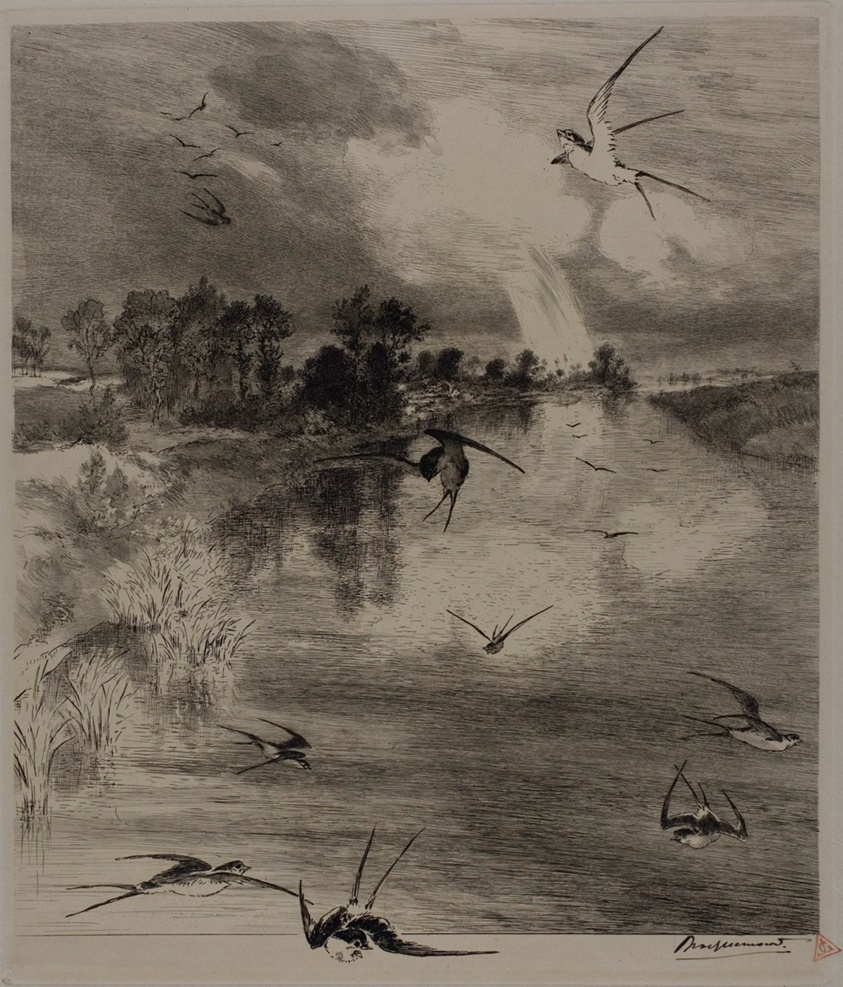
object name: Print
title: Swallows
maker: Felix Bracquemond; French, 1833–1914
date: 1882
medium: Etching and drypoint on ivory laid paper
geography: France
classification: etching; print; prints and drawing